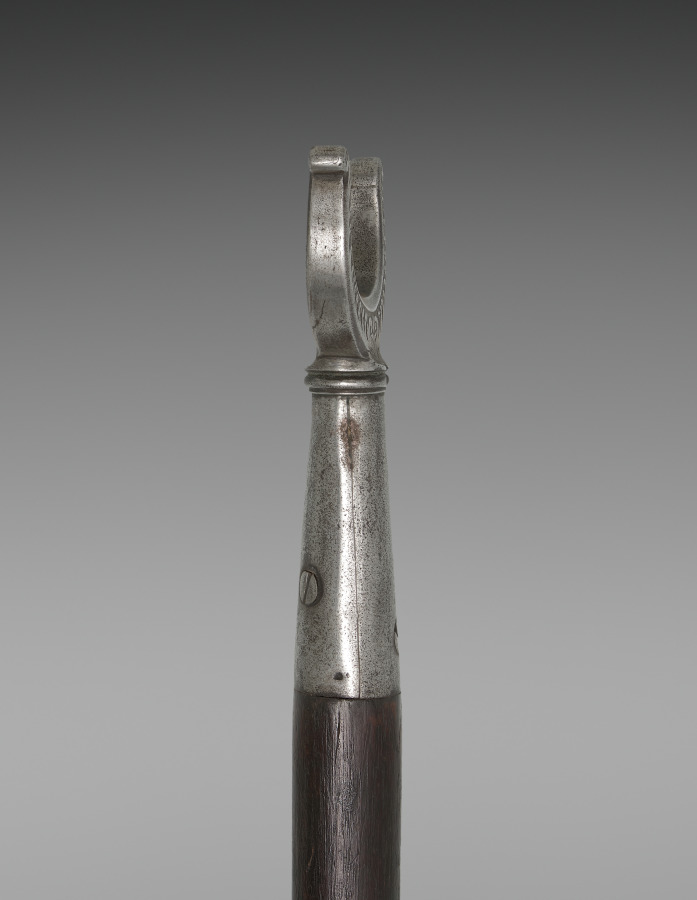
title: Gun Rest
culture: Italy, 17th century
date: 1600s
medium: steel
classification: Arms and Armor